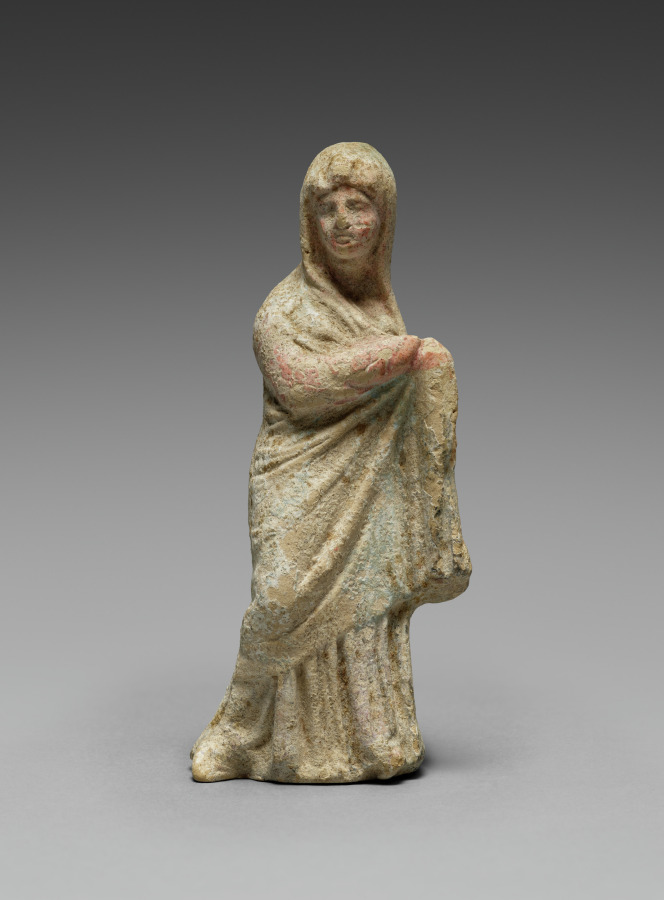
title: Figurine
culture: South Italy, Tarentum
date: 300–100 BCE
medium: terracotta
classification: Sculpture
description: Terracotta figurines like this one were popular throughout the ancient Mediterranean. This statuette takes the shape of a woman wearing a cloak or himation that twists around her form as she pulls it toward her left shoulder. Pigment is preserved in patches of red on the fabric over her arm. The figurine is mold-made, but only the front of the figure is modeled.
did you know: In ancient Greek art and literature, veiling the head or face was often a sign of αίδως (aidos), modesty or shame.